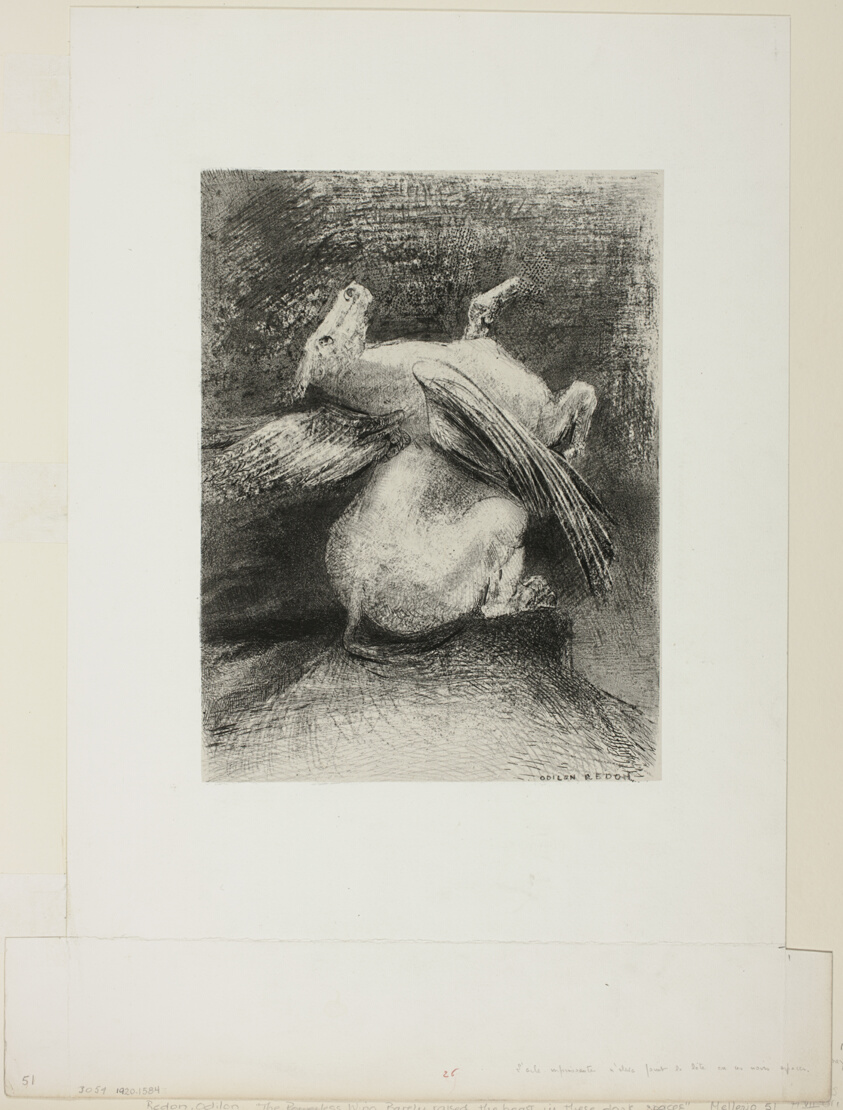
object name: Print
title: The Impotent Wing Did Not Lift the Animal Into That Black Space, plate 7 of 8 from "Les Origines"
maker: Odilon Redon (French, 1840-1916)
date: 1883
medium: Lithograph in black on light gray China paper, laid down on white wove paper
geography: France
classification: lithograph; print; prints and drawing; paper